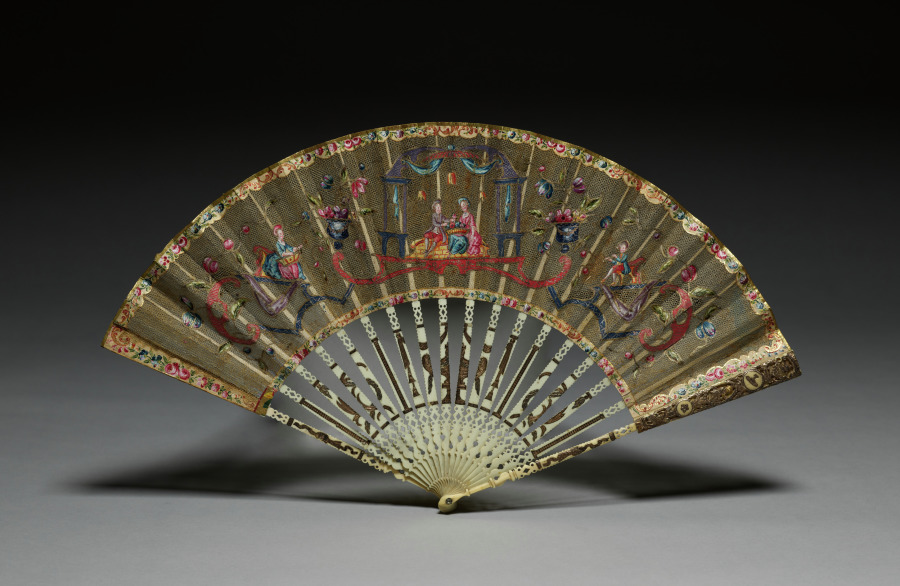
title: Folding Fan: Figures and Ornaments in Applique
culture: Germany (?)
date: c. 1770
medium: leaf: net, paper; frame: ivory with gold and silver inlays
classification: Miscellaneous